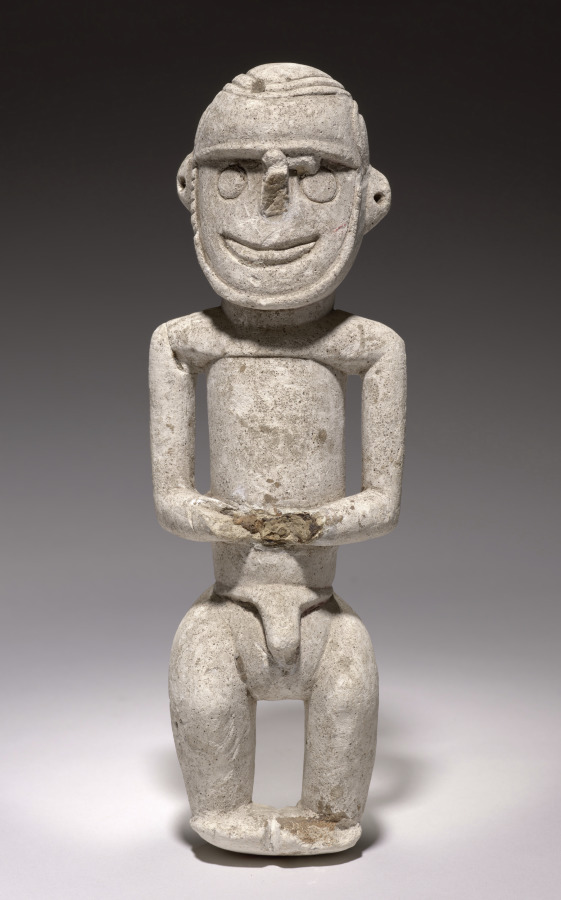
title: Male Ancestor Figure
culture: Melanesia, Central New Ireland, Namatani District, 20th century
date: before 1930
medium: limestone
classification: Sculpture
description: Carved and painted chalk figures from New Ireland served as repositories for the spirits of deceased men and women during funeral rituals. After the ceremony, the figures were destroyed or discarded, allowing the spirits to join their ancestors.